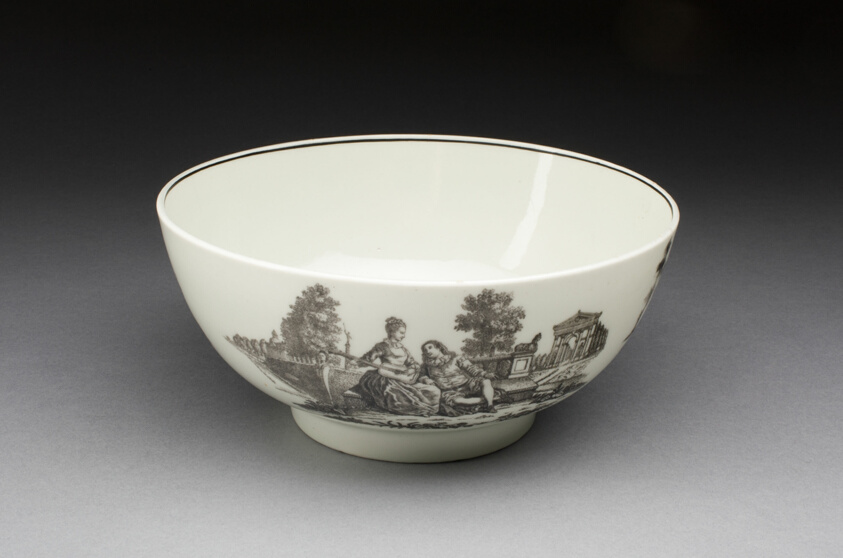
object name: Ceramics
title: Bowl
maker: Worcester Porcelain Factory (Flight Period, 1783-1792); Worcester, England, founded 1751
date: c. 1785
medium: Soft-paste porcelain with black transfer-printed decoration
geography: Worcester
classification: bowl; tableware; dish (vessel); porcelain; european decorative arts; ceramics